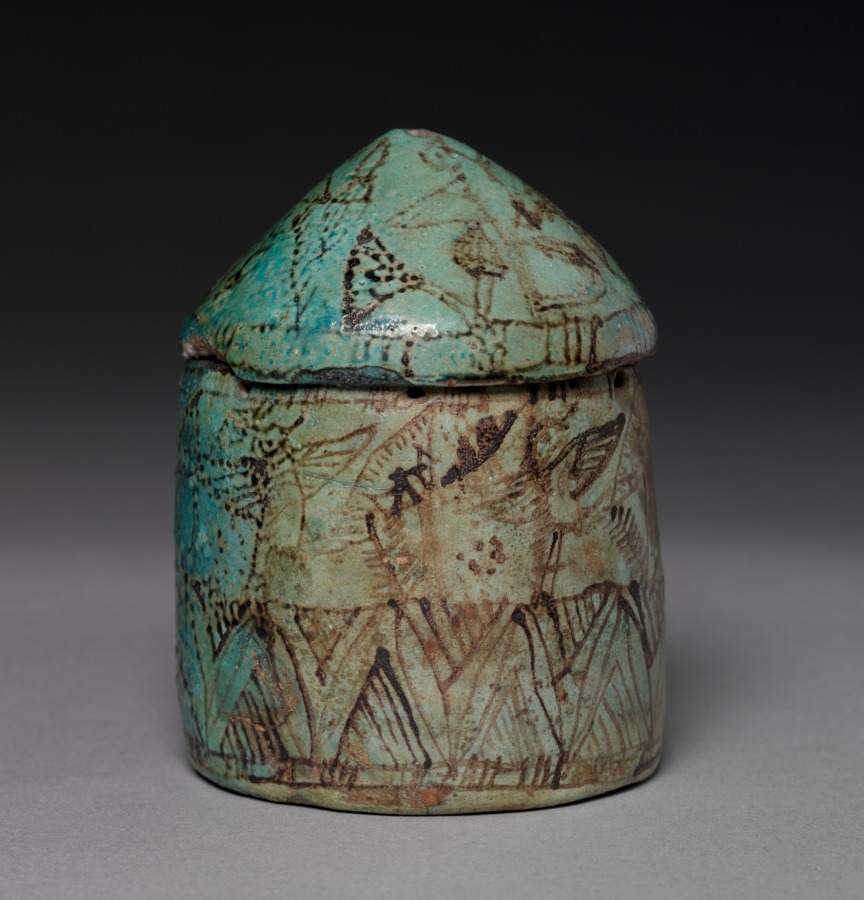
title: Pyxis with Lid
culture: Egypt, Middle Kingdom (2040–1648 BCE)–New Kingdom (1540–1069 BCE)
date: c. 1901–1525 BCE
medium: turquoise faience with black decoration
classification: Vessels